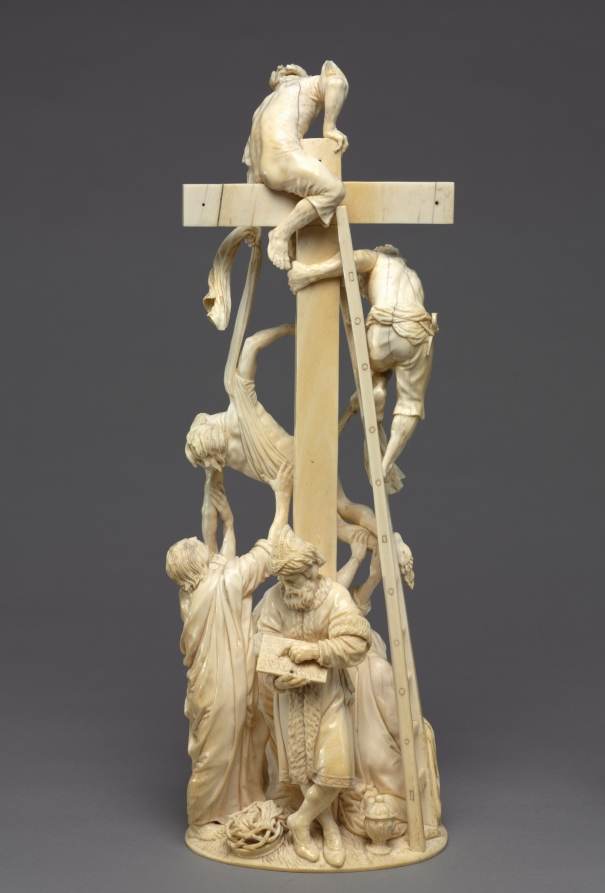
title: Descent from the Cross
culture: Austria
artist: Adam Lenckhardt (German, 1610–1661)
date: 1653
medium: ivory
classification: Sculpture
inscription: inscribed with monogram "AL" conjoined and dated 1653.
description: Carved from a single piece of ivory for Prince Karl Eusebius von Liechtenstein of Vienna, this work is a true tour-de-force. It took Lenckhardt seven years to complete; it is his last known sculpture and the pinnacle of his career. The biblical accounts of the descent from the cross found in the gospels are not consistent, which may contribute to the difficulty in precisely identifying the figures. The Virgin Mary, Saint John, Mary Magdalene, and others were said to be present, but undoubtedly there are other disciples here mourning Christ’s death. The intense emotion registers on the faces of the figures in the scrupulous and exquisitely detailed work.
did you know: Carved from a single elephant tusk, the artist took special care to ensure the ivory did not crack or break as he meticulously crafted each figure in this visually exciting sculpture. Look closely to find tools and small objects included near its base.